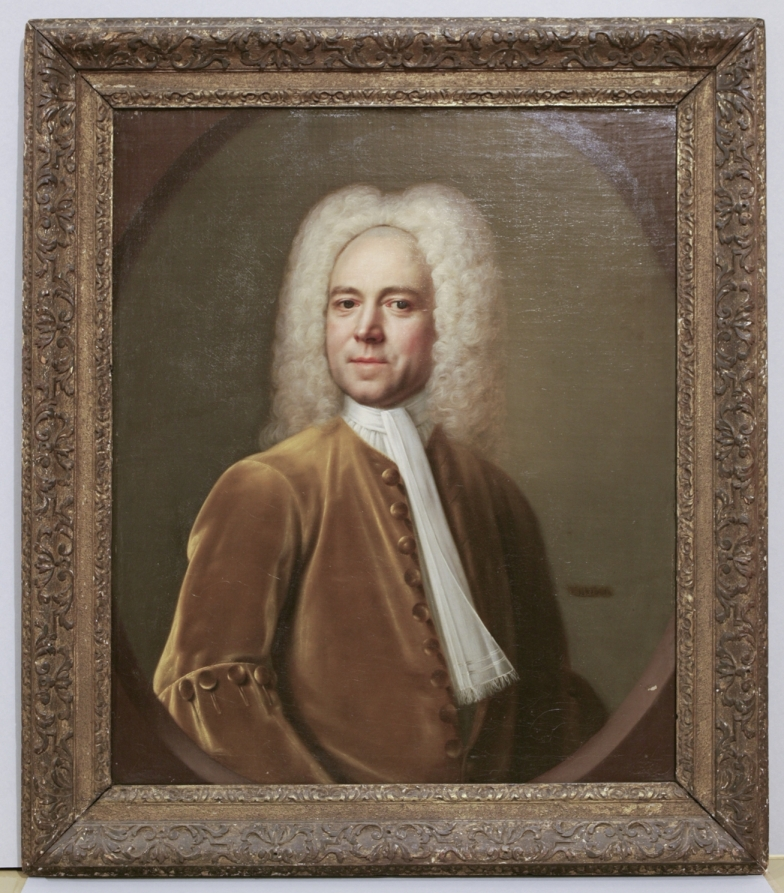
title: Portrait of a Man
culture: England, 18th century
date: c. 1730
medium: oil on canvas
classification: Painting